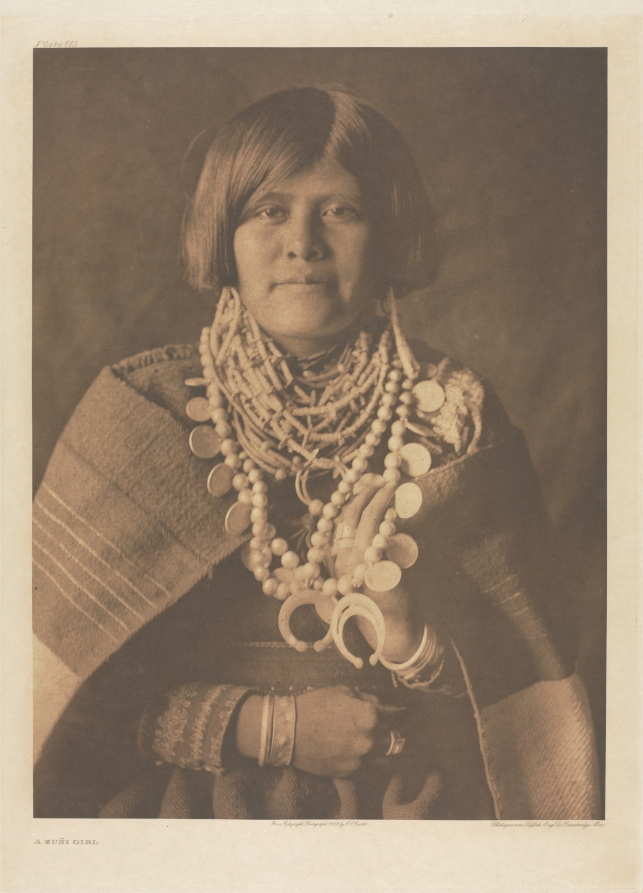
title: Portfolio XVII, Plate 613: A Zuñi Girl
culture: America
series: The North American Indian: being a series of Portfolios picturing and describing the Indians of the United States, the Dominion of Canada, and Alaska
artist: Edward S. Curtis (American, 1868–1952)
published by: The University Press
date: 1903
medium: photogravure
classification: Portfolio